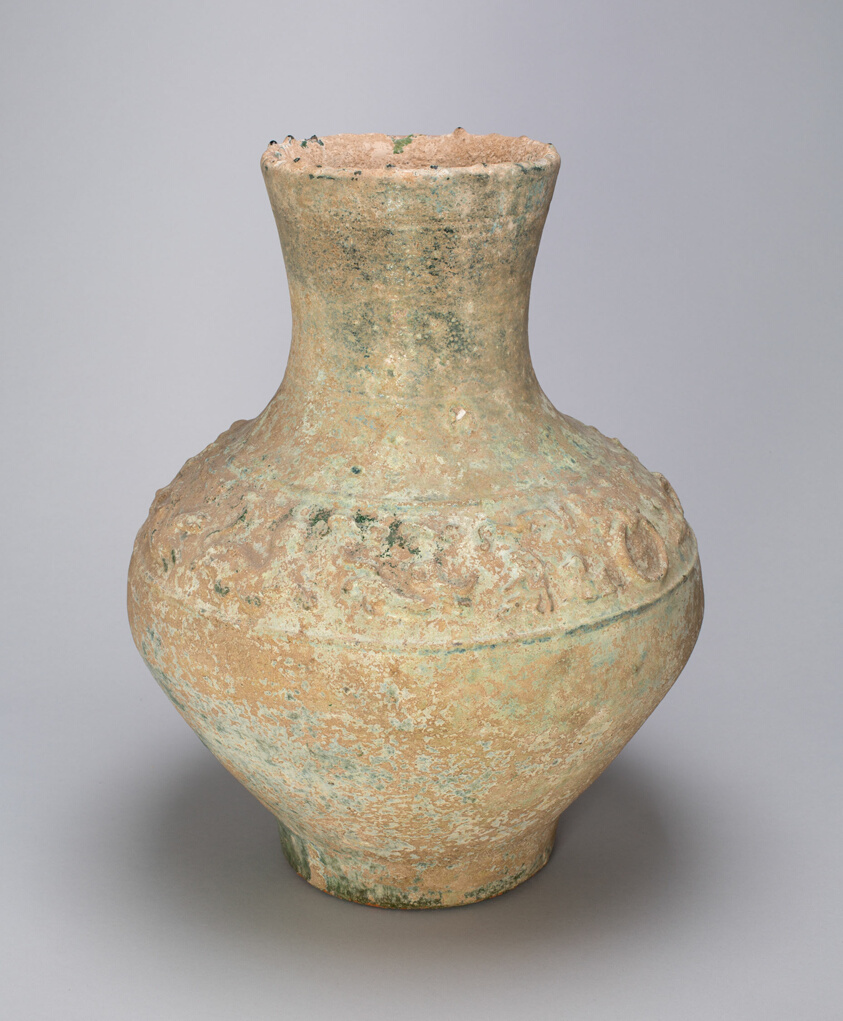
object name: Vessel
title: Storage Jar (Hu) with Hunting Scenes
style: Chinese (culture or style)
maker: China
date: Eastern Han dynasty (A.D. 25–220)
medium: Earthenware with underglaze molded decoration and green lead glaze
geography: China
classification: earthenware; asian art; ceramics; vessel